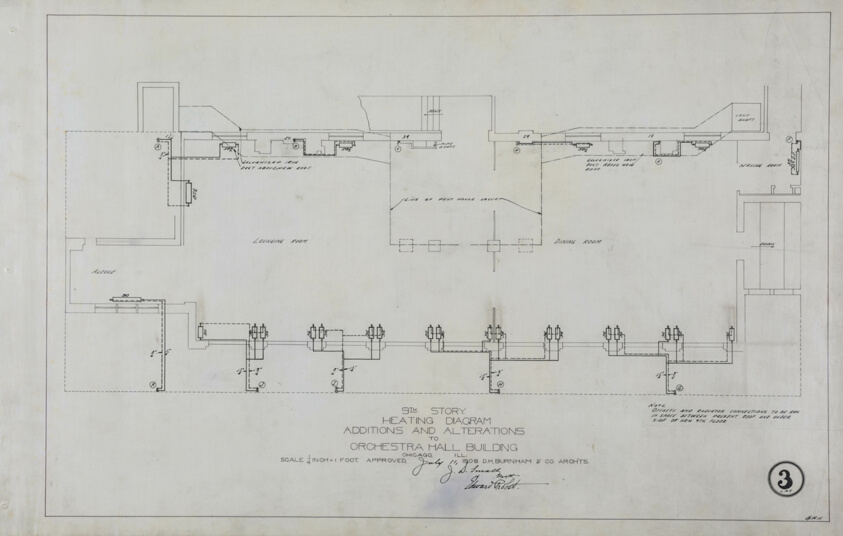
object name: Architectural Drawing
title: Orchestra Hall Heating Revisions, Chicago, Illinois, Diagrams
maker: D.H. Burnham & Company; American, 1896–1912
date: 1908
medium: Ink on linen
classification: architecture; architectural drawing